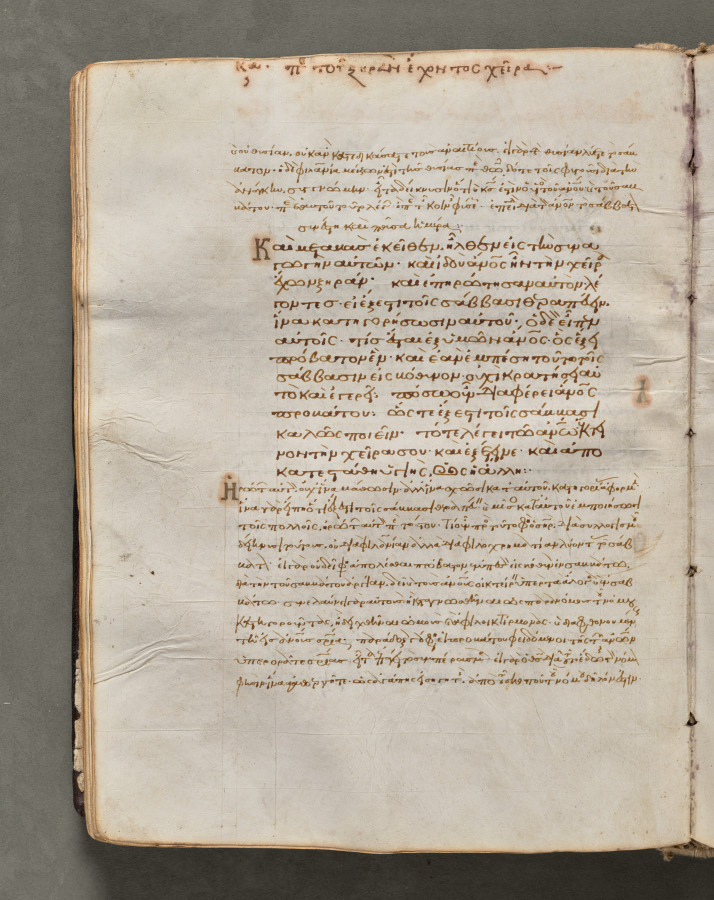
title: Text, folio 51 (verso), from a Gospel Book with Commentaries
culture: Byzantium, Constantinople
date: c. 1000–1100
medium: ink, tempera, and gold on vellum; leather binding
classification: Bound Volume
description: Each of the four gospels in this book opens on a page with brilliantly illuminated borders depicting the author of the text as well as birds-principally peacocks, symbols of the immortality of the soul-and fountains, representing the fountain of life and the salvation of the soul. This volume consists of 428 leaves with texts in Greek. Its level of sophistication suggests that it was probably written and decorated in a monastery in Constantinople.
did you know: Gospel Books were carried in procession through Byzantine churches.